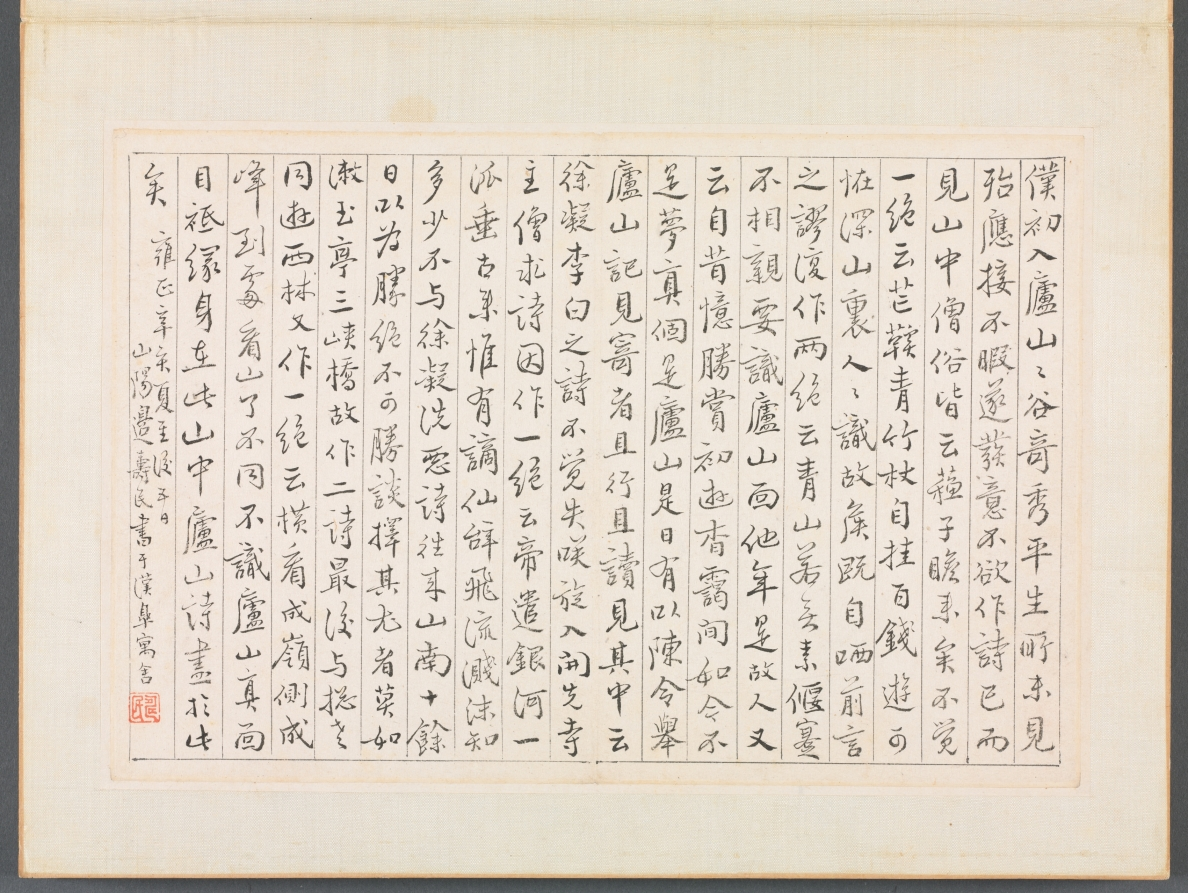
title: Album of Calligraphy and Paintings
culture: China, Qing dynasty (1644-1911)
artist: Bian Shoumin (Chinese, 1684–1752)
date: first half of the 1700s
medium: album leaf; ink and color on paper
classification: Painting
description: The artist Bian Shoumin is known for his depiction of wild geese, water, and reeds. The migrant birds in autumn and winter evoked, in the minds of the Chinese intelligentsia, a time of parting and sorrow.